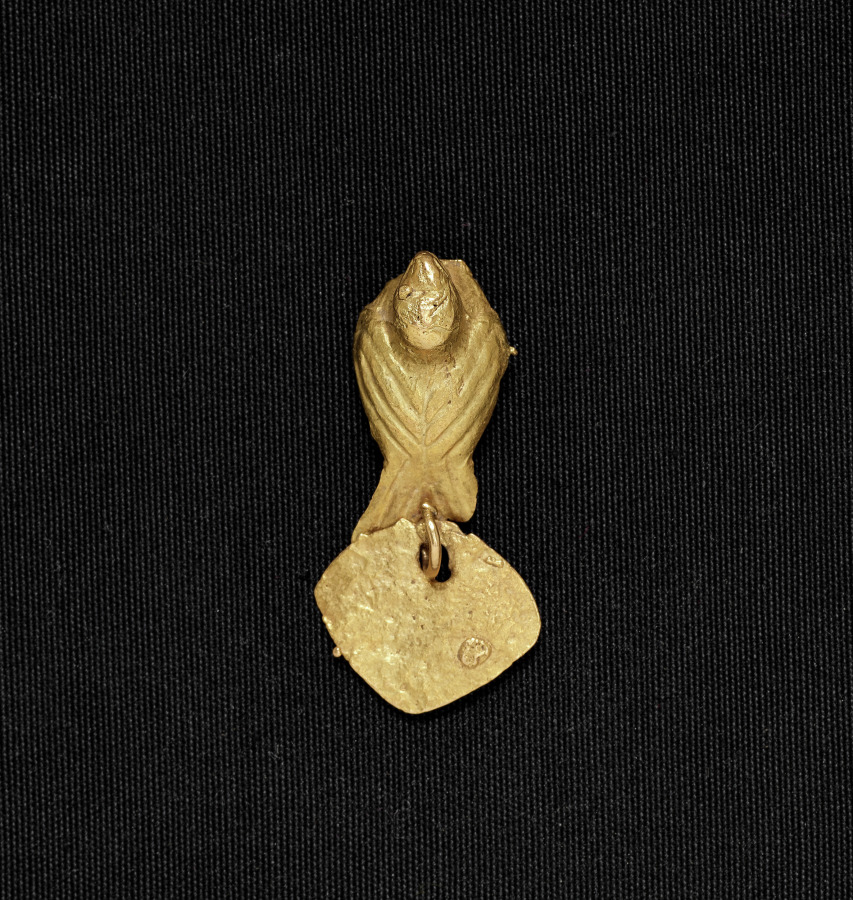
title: Bird Bead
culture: Colombia, Muisca style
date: c. 900–1550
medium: cast gold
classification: Jewelry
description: Muisca metalwork divides into two categories: ornaments to be worn, such as these, and offering figurines, in the case to the right. The elaborate bird pendant features delicate herringbone moldings, openwork patterns, and wing details-all part of the wax model from which the pendant was cast (see nearby computer animation). The dangles were attached after casting.